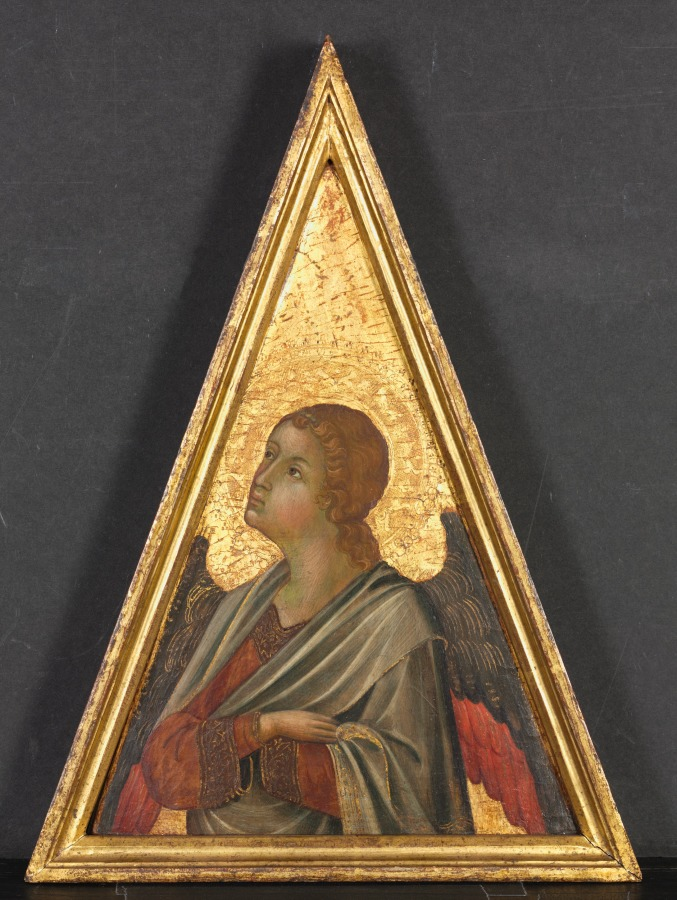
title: Pinnacle with Angel (pair)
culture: Italy, Siena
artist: circle of Niccolò di Segna (Italian)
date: c. 1340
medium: tempera and gold on wood panel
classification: Painting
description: These pinnacles were originally set on top of a multipanel altarpiece that has now been lost. The angels' gestures and glances suggest that they were placed to the left and right of a central image.